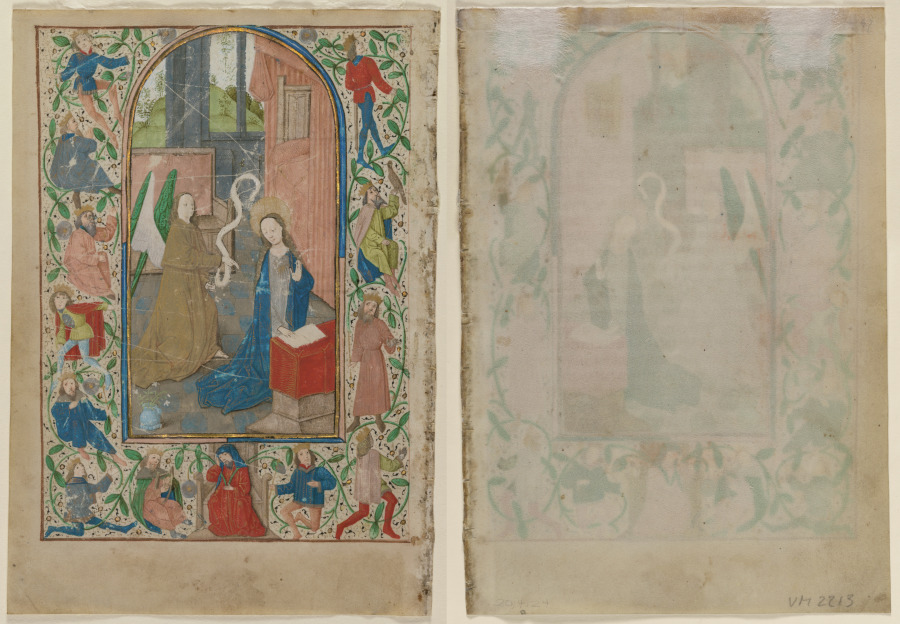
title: Leaf from a Book of Hours: The Annunciation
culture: Flanders, Ghent (?)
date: 1470s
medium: ink, tempera, and gold on vellum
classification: Manuscript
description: The Annunciation is the traditional introduction to matins, the first of the eight canonical hours. This striking scene recalls the archangel Gabriel's announcement to the Virgin Mary that she was to become the mother of God. The humble scene, steeped in monumentality and innocence, honors one of the most significant moments in Christian history—the coming of God into the world. Flemish artists, in particular, tenderly elaborated this event. The Virgin is usually shown within an architectural interior. Typically her bedroom, this interior space includes a curtained bed, a wooden bench, windows through which a landscape is revealed, and a simple earthenware ewer filled with lilies that proclaim her innocence. Within this private setting, Mary kneels to read from an open book of hours. Her prayer is interrupted by the angel's appearance and she is captured by the artist in stunned surprise. The miniature is accompanied by an illustration in the margins of the Tree of Jesse, the family tree showing Jesus's human descent from Jesse, the father of King David, through the royal house of Judah. The motif begins in the lower margin with the seated Jesse, from whom a tree grows. David, Solomon, and various kings and prophets can be seen in its branches.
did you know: A raised hand indicates Mary's stunned surprise.